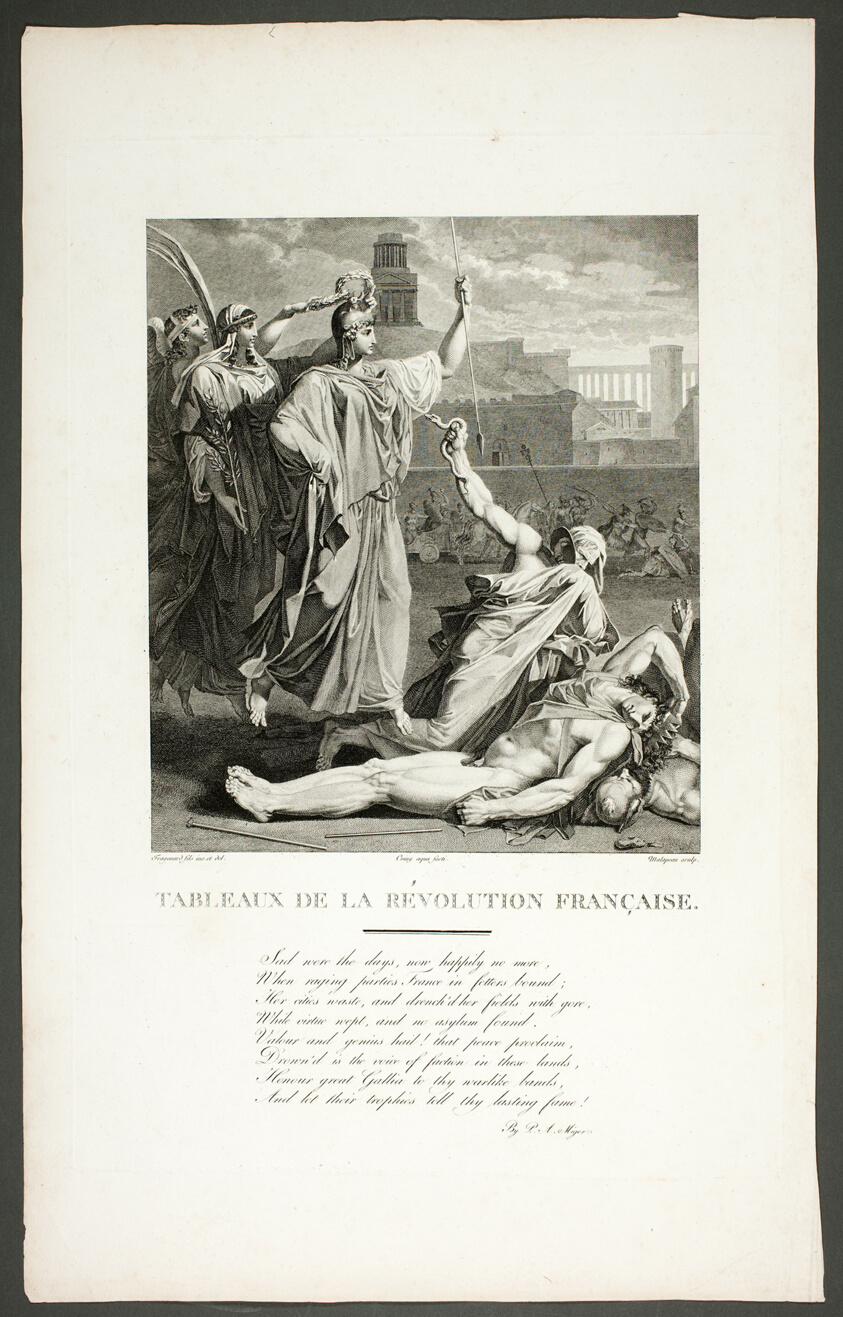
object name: Print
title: Frontispiece to the series Tableaux de la révolution française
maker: Claude Nicolas Malapeau (French, 1755-1803); Jacques Joseph Coiny (French, 1761-1809); after Alexandre Évariste Fragonard (French, 1780-1850)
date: Published 1804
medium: Etching with engraving, roulette and stipple on ivory wove paper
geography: France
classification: etching; print; prints and drawing